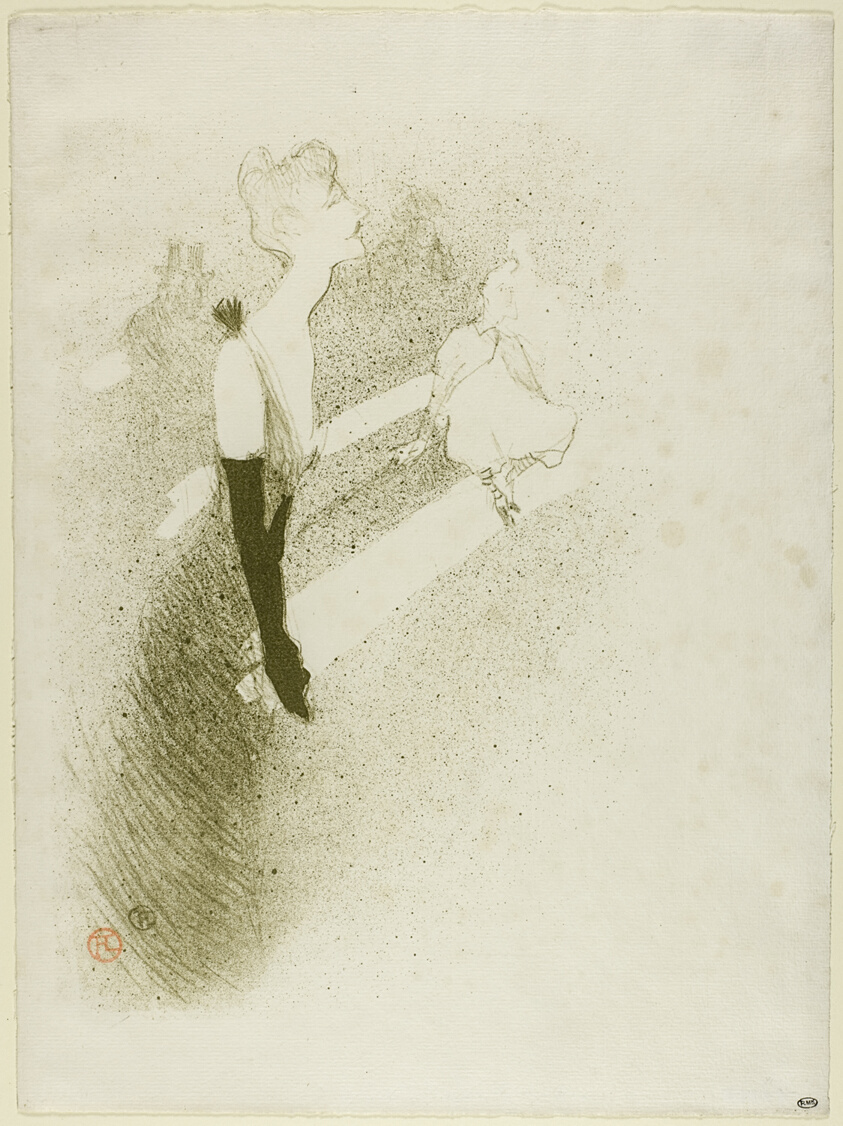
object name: Print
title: Yvette Guilbert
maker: Henri de Toulouse-Lautrec (French, 1864-1901)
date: 1894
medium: Color lithograph on ivory laid paper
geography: France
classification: lithograph; print; prints and drawing